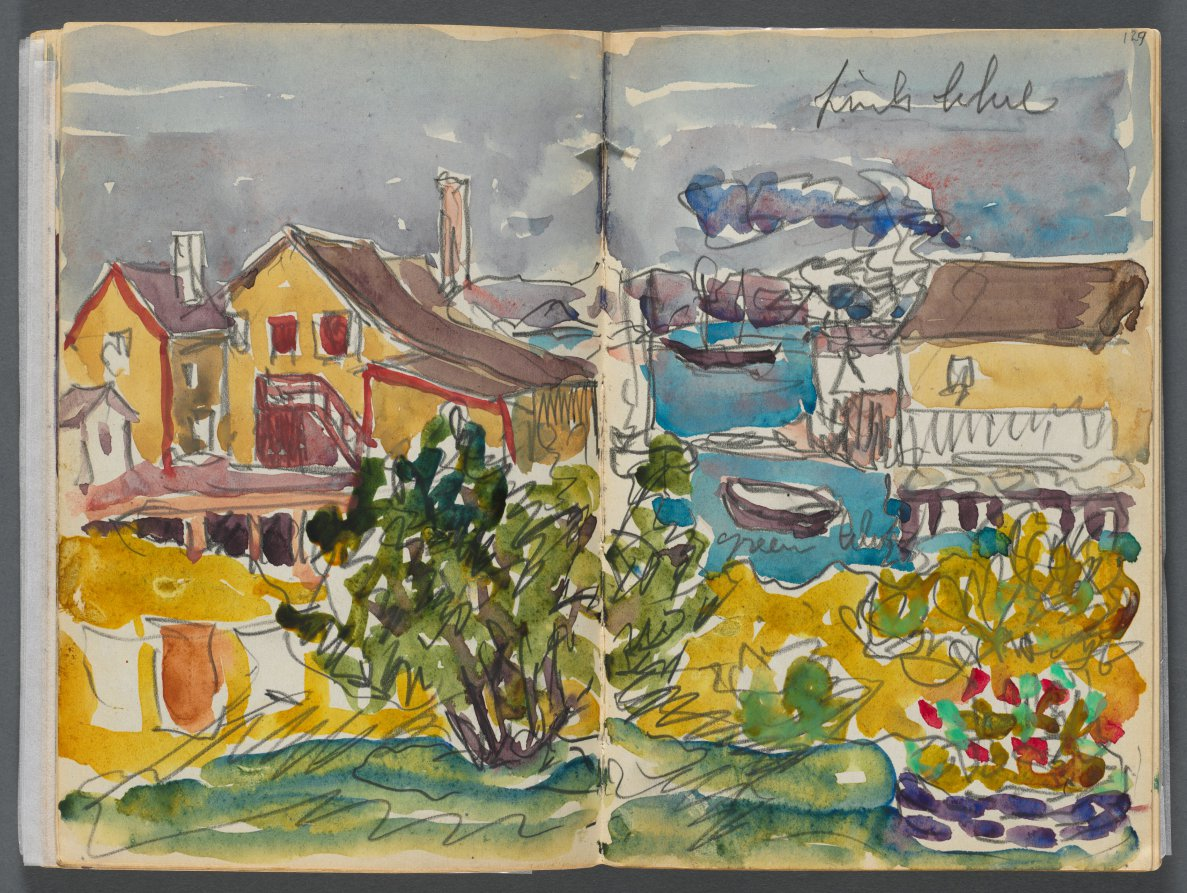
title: Sketchbook- The Granite Shore Hotel, Rockport, page 128 & 129: Houses on the Harbor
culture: America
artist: Maurice Prendergast (American, born Newfoundland [now Canada], 1858–1924)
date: 1905–10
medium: graphite and watercolor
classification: Bound Volume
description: This sketchbook contains 72 pages of pencil drawings and 9 watercolors of Cape Ann. On the inside of the cover Prendergast wrote the address of the Granite Shore Hotel in Rockport, Massachusetts.